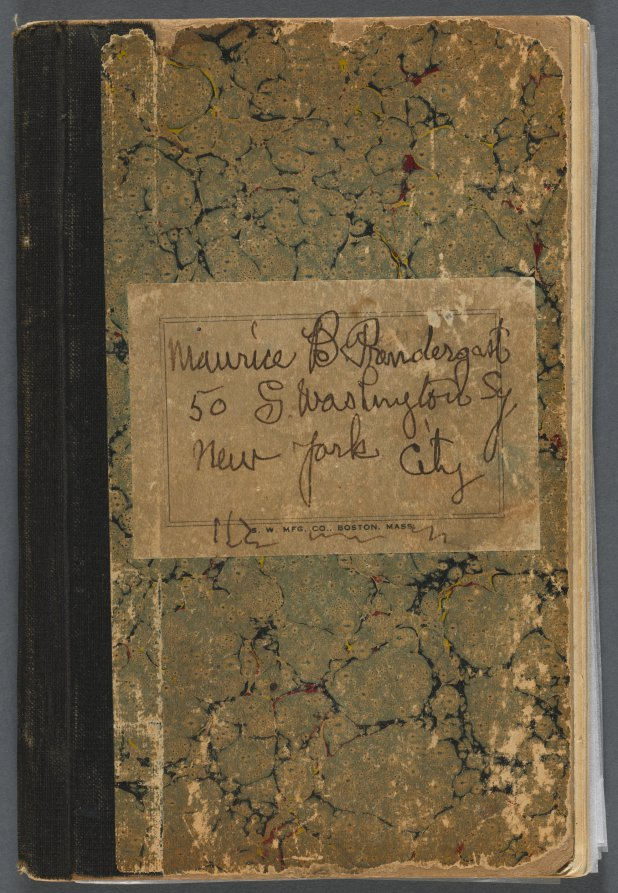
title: Sketchbook- The Granite Shore Hotel, Rockport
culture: America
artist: Maurice Prendergast (American, born Newfoundland [now Canada], 1858–1924)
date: c. 1916/19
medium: pencil and watercolor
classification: Bound Volume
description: This sketchbook contains 72 pages of pencil drawings and 9 watercolors of Cape Ann. On the inside of the cover Prendergast wrote the address of the Granite Shore Hotel in Rockport, Massachusetts.